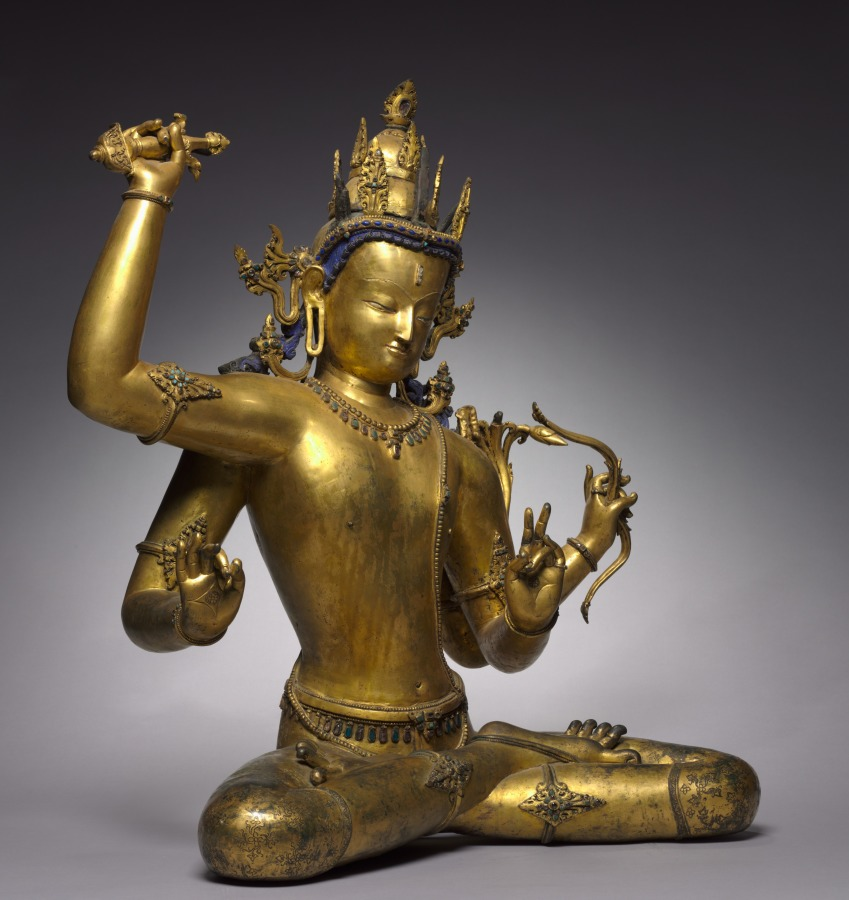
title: Bodhisattva of Wisdom (Manjushri)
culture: Nepal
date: 1400s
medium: Gilt bronze with precious and semiprecious stones, gum tempera, and cold gold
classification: Sculpture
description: This image depicts one of the main bodhisattvas, beings only one stage away from full enlightenment. Because the historical Buddha was a prince prior to his renunciation and life as a wandering ascetic, bodhisattvas are depicted as royal princes. This example has the sharp features, sweet expression, and crisp details characteristic of images made in Nepal during the 1400s. In his upraised right hand Manjushri holds the hilt of a sword that, like wisdom itself, metaphorically cuts through and defeats ignorance. His lower, rear left hand grasps a bow, once probably strung with a wire. Also missing is the arrow that he likely held in his lowered right hand. Arrows were often symbols for mantras, or strings of syllables thought to have the power to focus the mind and work like missiles to destroy negativity and affliction. The gesture of his lowered left hand indicates the transmission of Buddhist teachings. The lotus stem that rises at the left elbows originally held a book of sutras. This figure is in the yogic posture of meditation with the big toe flexed in concentration. Yoga is of central importance in tantric Buddhism, because high-level practitioners are able to discipline the body to such an extent that the mind can also be controlled.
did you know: The bodhisattva's short breeches are patterned in spiraling floral forms incised into the metal.